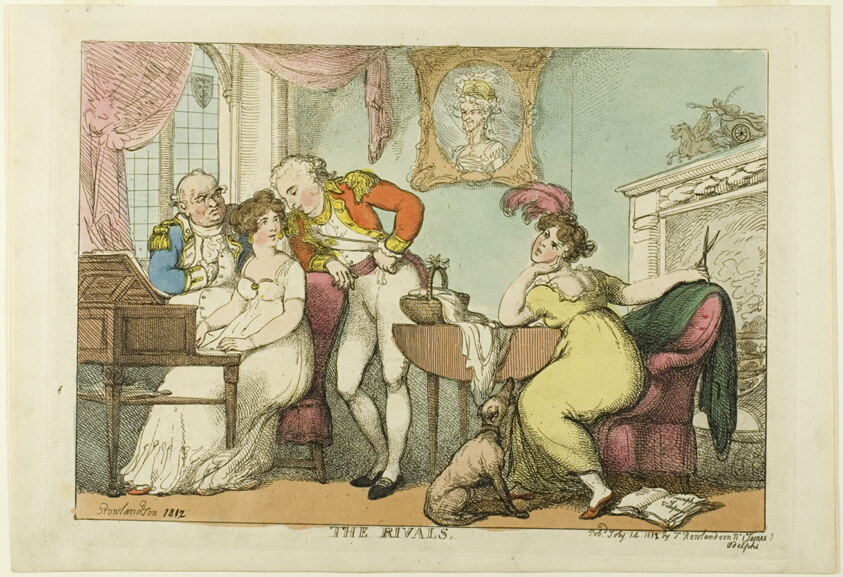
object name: Print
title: The Rivals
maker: Thomas Rowlandson (English, 1756-1827)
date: published July 14, 1812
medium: Hand-colored etching and stipple engraving on ivory wove paper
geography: England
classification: engraving; print; prints and drawing